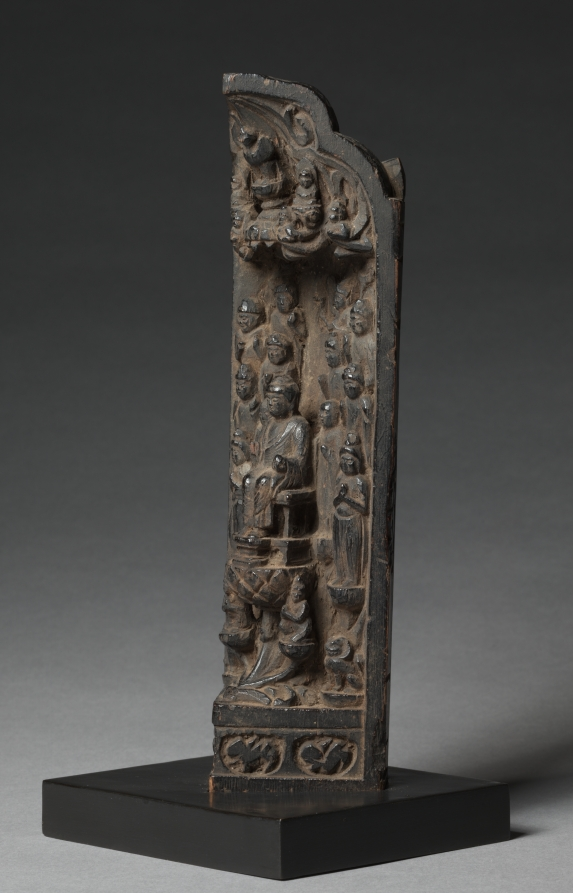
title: Wing of a Portable Shrine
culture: Japan, Heian period (794–1185)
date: 794–1185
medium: wood with lacquer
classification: Sculpture